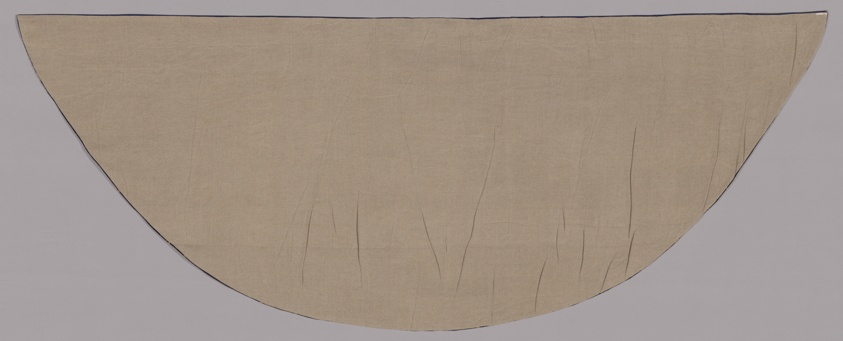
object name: Textile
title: Cope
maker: Probably Spain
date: 1450/1500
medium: Silk cut velvet embroidered with couched gilt-metal-strip-wrapped silk; later additions: orphrey band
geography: Spain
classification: textile; weaving - velvet; liturgical